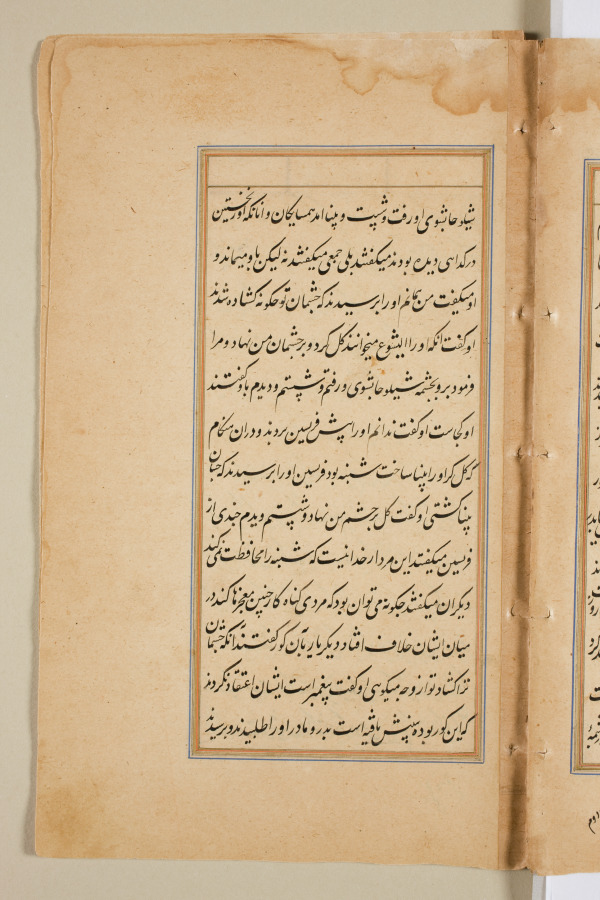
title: Text page from a Mirror of Holiness (Mir’at al-quds) of Father Jerome Xavier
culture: Mughal India, Allahabad, made for Prince Salim (1569–1627)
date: 1602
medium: Ink and gold on paper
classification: Manuscript